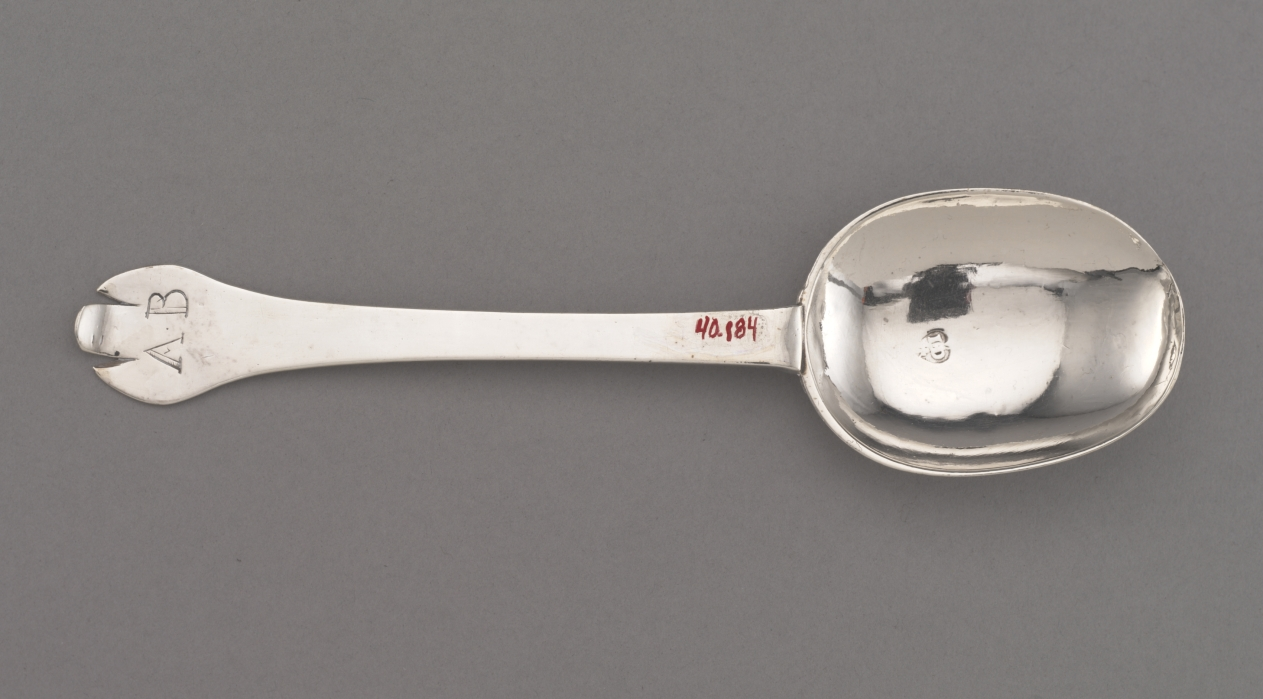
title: Spoon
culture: America, Massachusetts, Boston, late 17th Century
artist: Jeremiah Dummer (American, 1645–1718)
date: 1685–1700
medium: silver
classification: Silver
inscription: engraved in shaded block letters on back of handle end below punched device (sword in a stone?): I+P; in block letters on top of handle end: A.B.